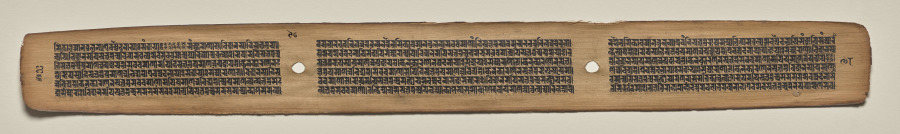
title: Text, Folio 98 (verso), from a Manuscript of the Perfection of Wisdom in Eight Thousand Lines (Ashtasahasrika Prajnaparamita-sutra)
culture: Eastern India, Bihar, Vikramashila Monastery. Painting: Nepal, Kathmandu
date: Sunday, September 14, 1119 (year 239 of the Newar Samvat in the month of Ashvina)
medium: gum tempera and ink on palm leaves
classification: Painting